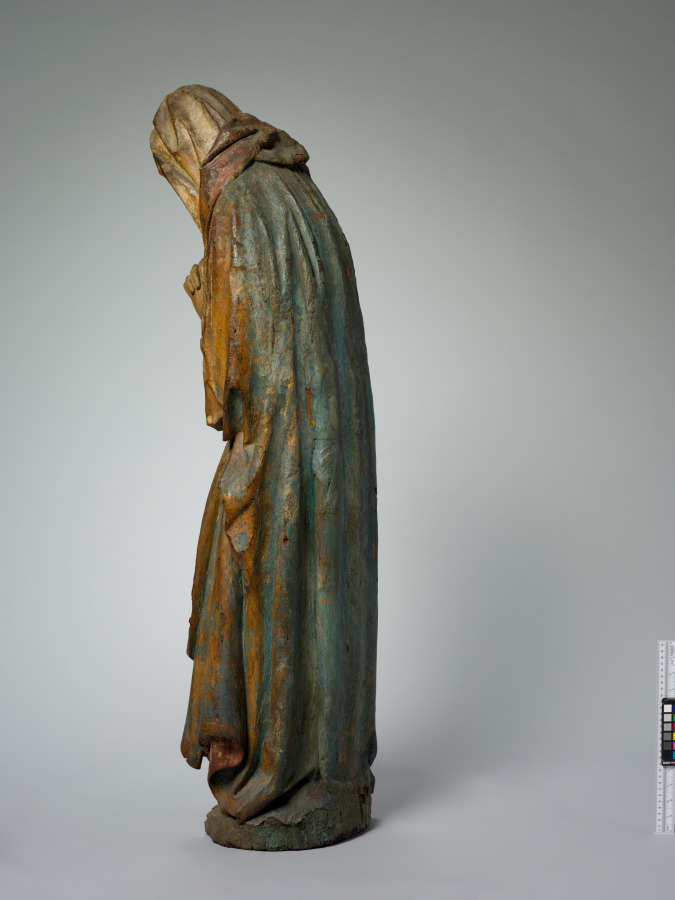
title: Virgin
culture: France, Champagne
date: 1510–15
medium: painted oak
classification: Sculpture